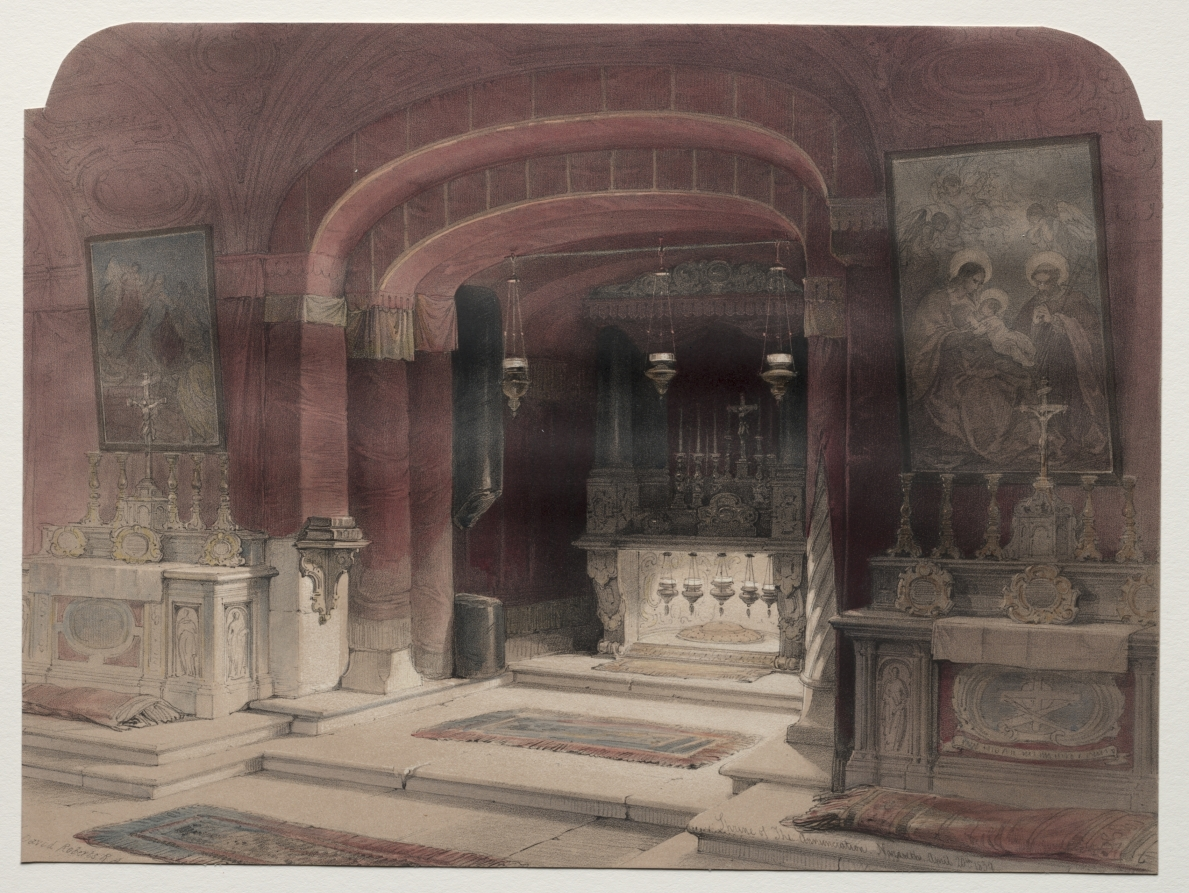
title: Shrine of the Annunciation, Nazareth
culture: England, 19th century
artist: David Roberts (Scottish, 1796–1864)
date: 1839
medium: color lithograph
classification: Print